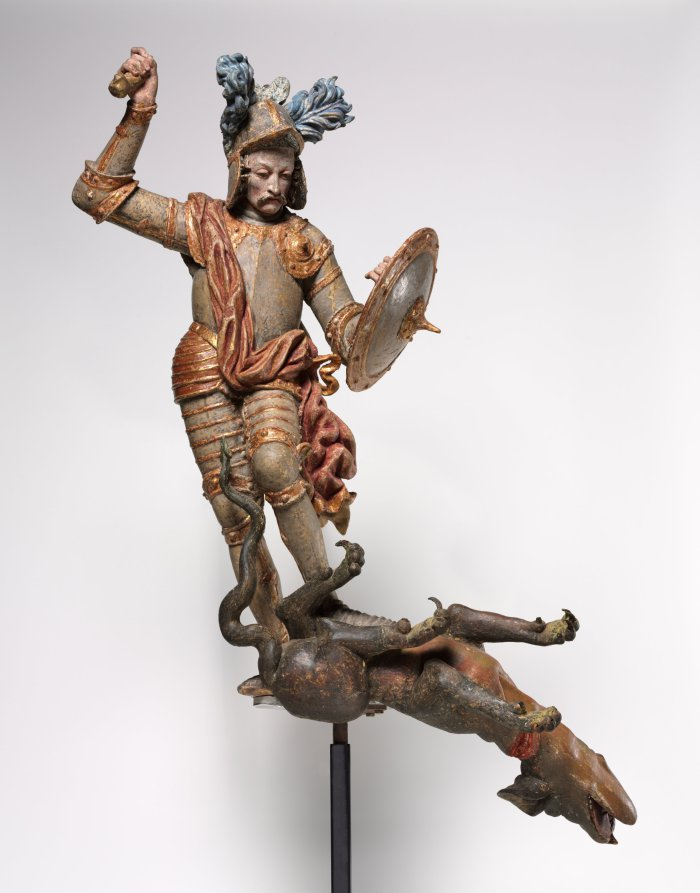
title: Saint George and the Dragon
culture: South Germany or Austria, late 17th century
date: late 1600s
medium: painted and gilded wood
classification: Sculpture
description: Saint George, a Roman soldier martyred for his Christian faith, is best known for slaying a fearsome dragon that terrorized the city of Silene, in Libya. George offered to kill the monster if residents of the city convert to Christianity. Here, George stands triumphantly over the dragon, writhing as it dies. The artist deliberately incorporated features intended to make his figure seem more familiar: the dragon seems more canine than reptilian, while George wears armor from the recent past and bears almost portrait-like facial features.